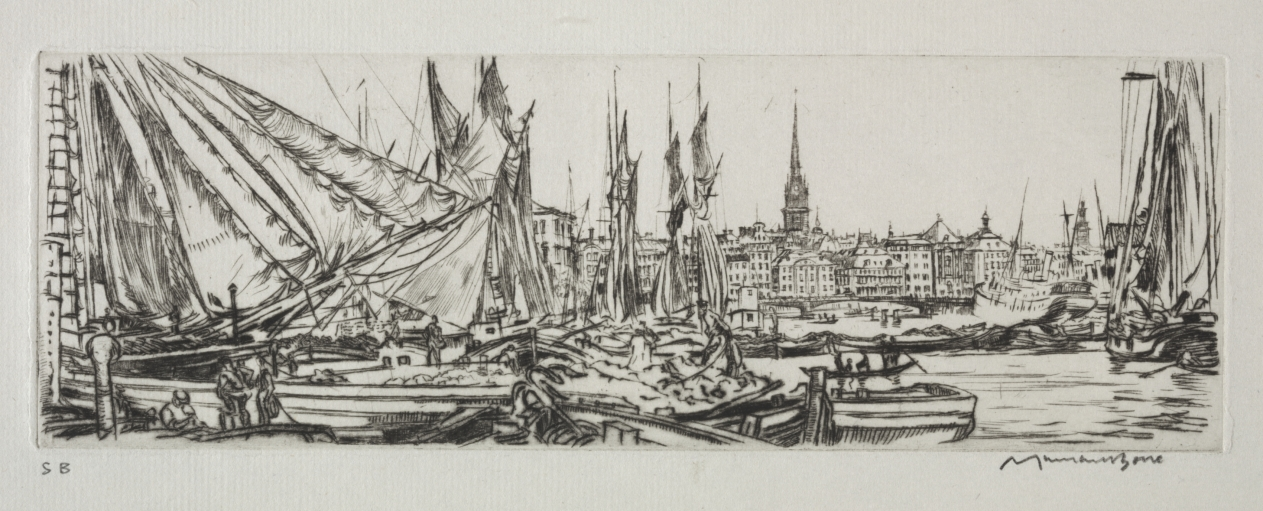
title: Stockholm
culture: England, 20th century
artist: Muirhead Bone (British, 1876–1953)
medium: drypoint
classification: Print